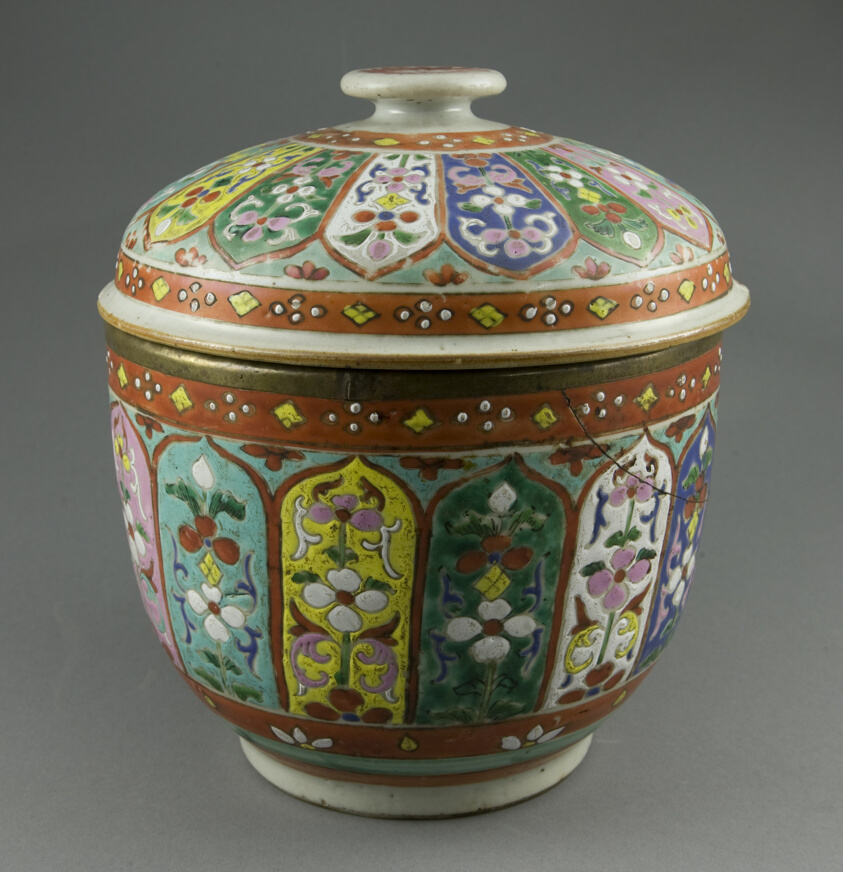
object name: Decorative Arts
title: Bencharong (Five-Colored) Ware, Covered Jar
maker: China, for the Thai Market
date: 19th century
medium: Porcelain painted in overglaze polychrome enamels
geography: China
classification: porcelain; asian art; ceramics; decorative arts